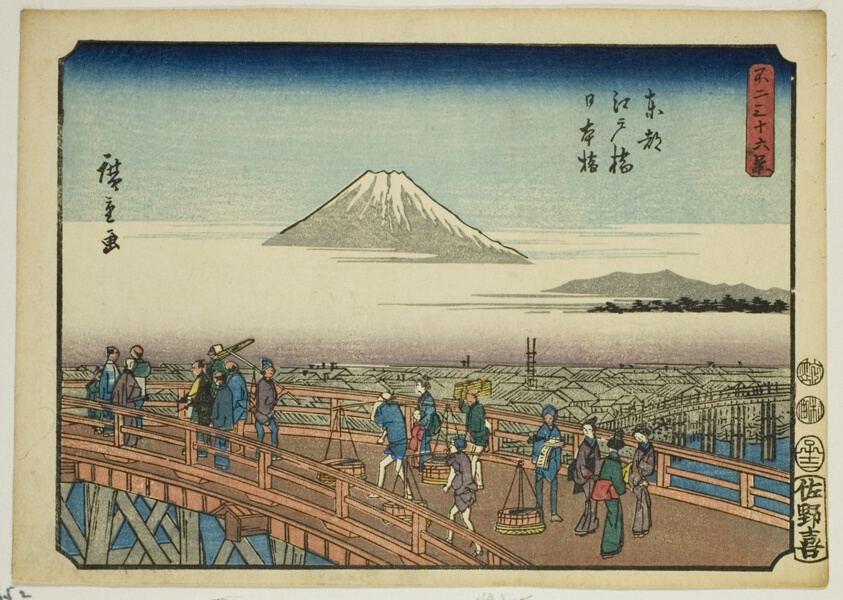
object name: Print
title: Edo Bridge and Nihon Bridge in the Eastern Capital (Toto Edobashi Nihonbashi), from the series "Thirty-six Views of Mount Fuji (Fuji sanjurokkei)"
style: Japanese (culture or style)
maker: Utagawa Hiroshige 歌川 広重; Japanese, 1797-1858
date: 1852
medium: Color woodblock print; chuban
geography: Japan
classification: woodblock print; print; asian art